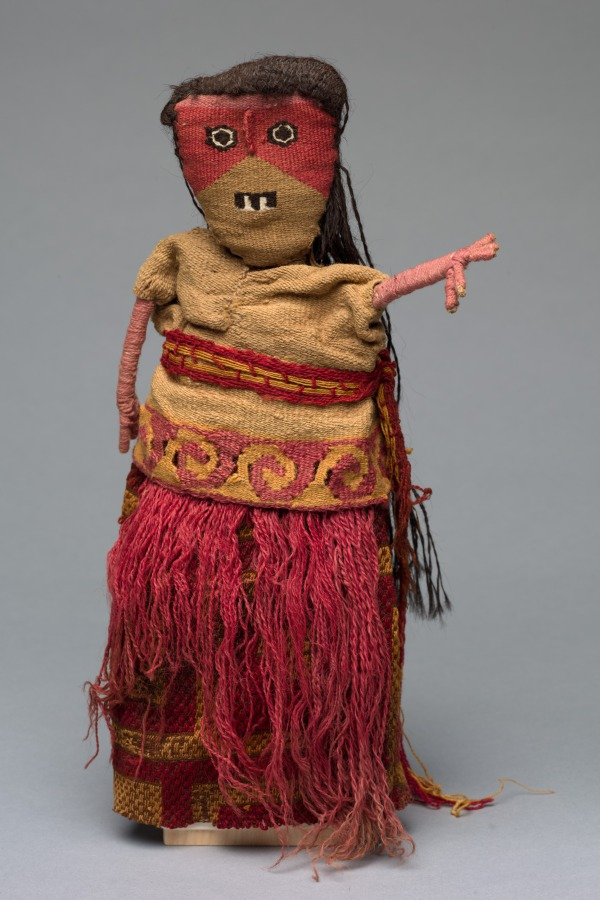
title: Male Figure with Modern Additions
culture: Peru, Central Coast, Chancay people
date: 1100–1500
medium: Original elements include the head and tunic; added elements include the skirt, red fringe, and belt; Cotton, camelid fiber, reeds; Slit tapestry (tunic and face); plain weave with supplementary weft (skirt)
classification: Miscellaneous